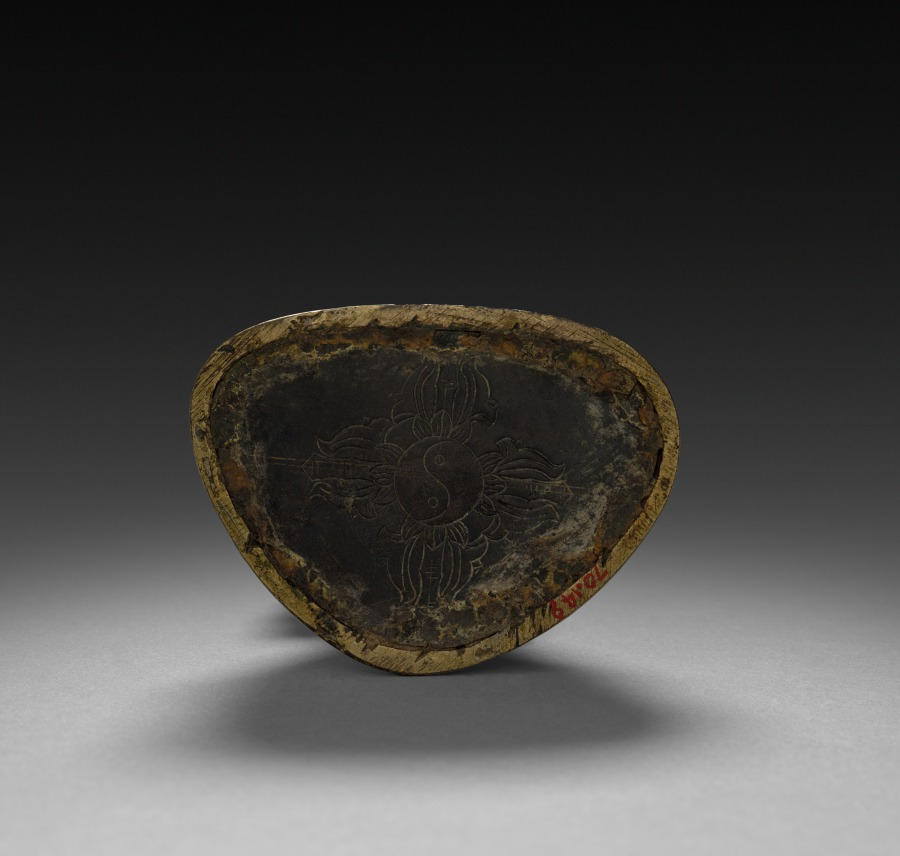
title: Seated Buddha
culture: China, Ming dynasty (1368–1644)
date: 1500s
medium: gilt bronze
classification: Sculpture